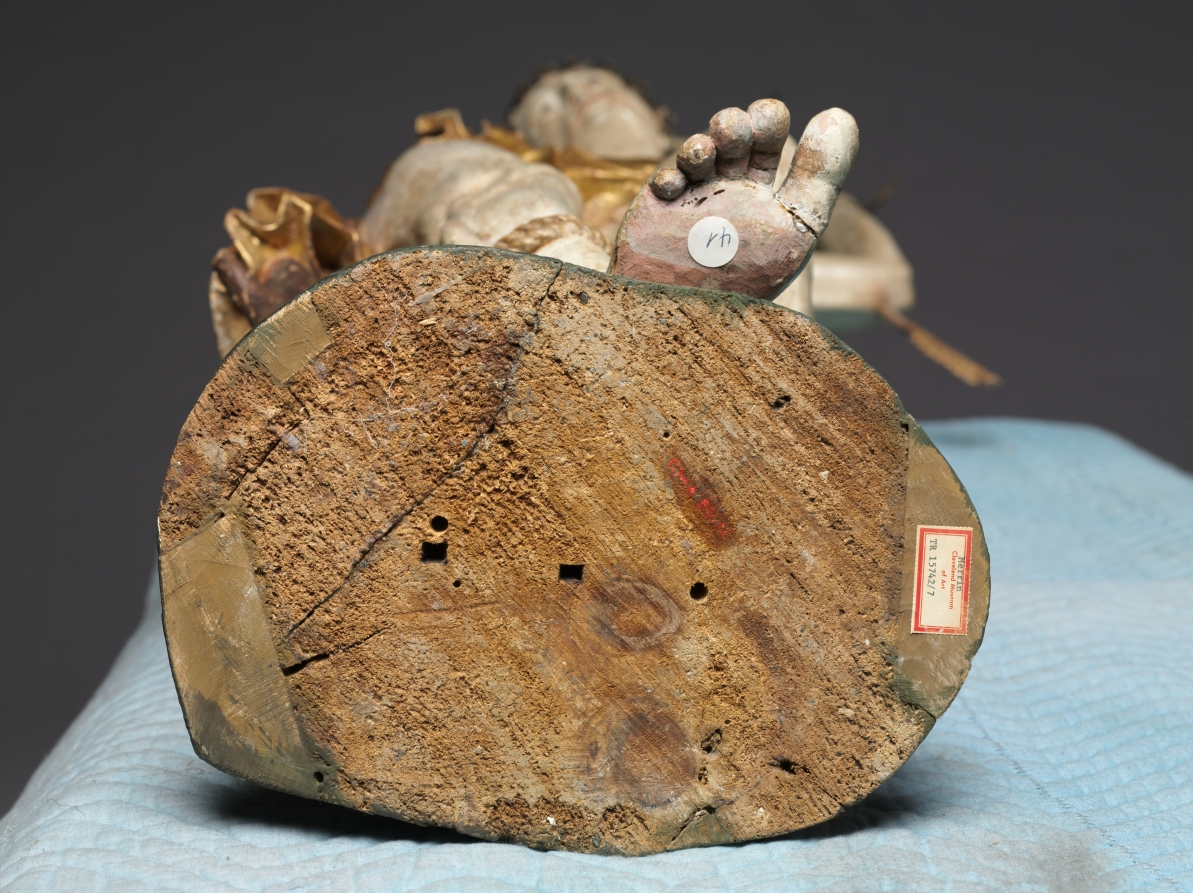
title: Saint Sebastian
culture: Germany, early 17th century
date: c. 1600–1620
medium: painted and gilded wood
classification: Sculpture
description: An early Christian saint and martyr, Sebastian was condemned to death by the Roman emperor Diocletian. Bound to a tree and shot with arrows, he survived—only later to be martyred by beating. This figure embodies the blend of stylistic influences that characterized German sculpture in the early 1600s. The graceful pose and anatomical naturalism of the legs indicate the influence of Italian Mannerism, while the crisp, stylized patterns of Sebastian’s hair and loincloth recall German Gothic works from the 1400s. The tree to which Sebastian is bound is an actual branch, shaped and refined to its present appearance.